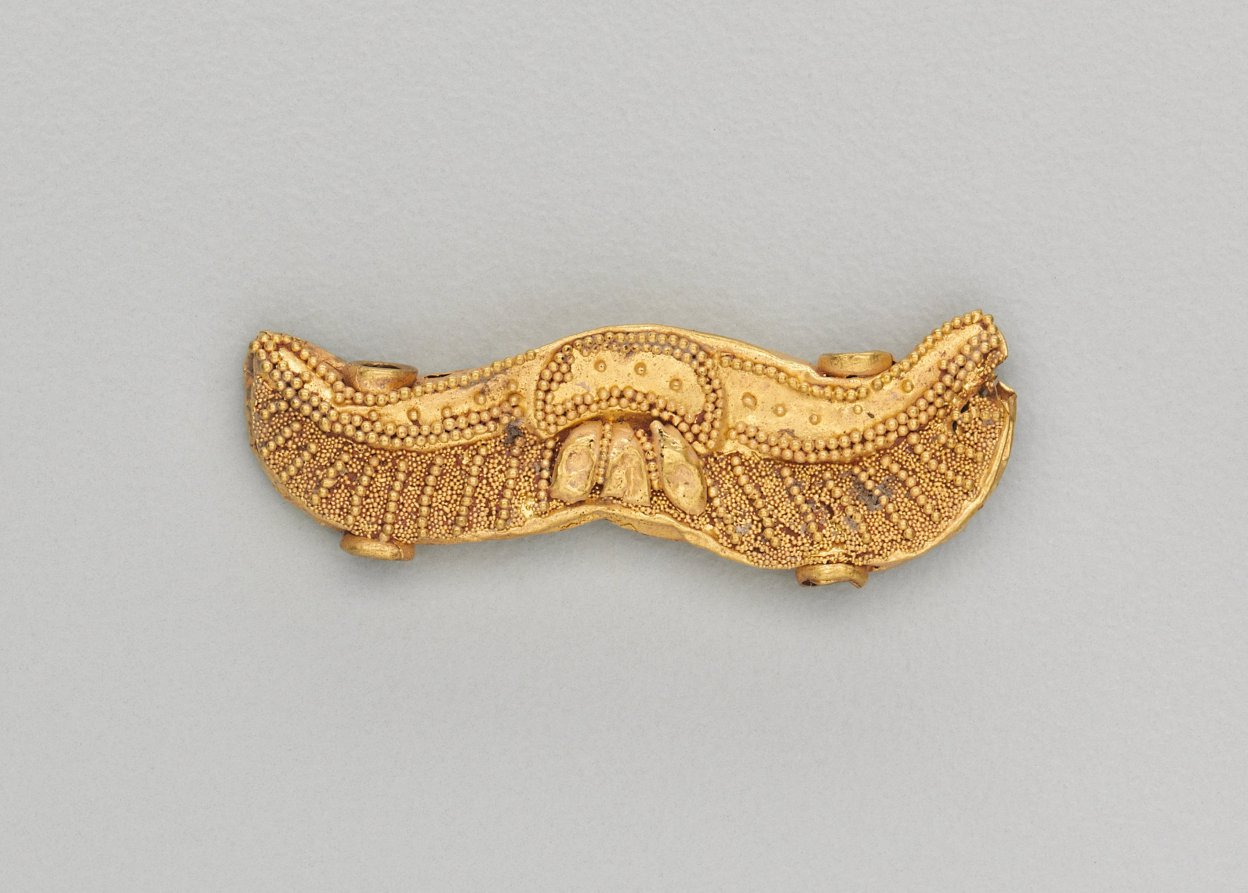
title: Set of Pendants Ending in a Bull's Head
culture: India, Shunga period (185–78 BCE)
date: 185–72 BCE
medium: gold repoussé with granulation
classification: Jewelry